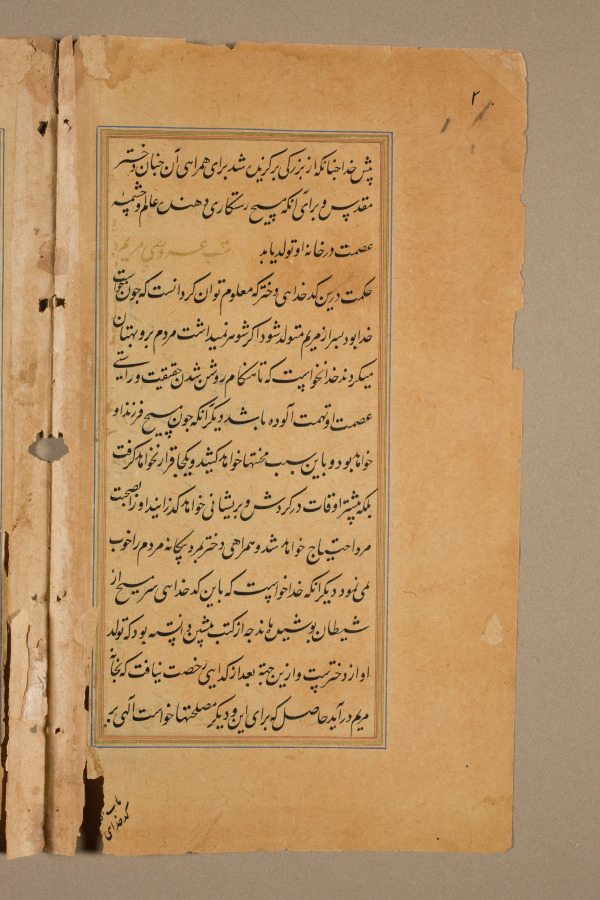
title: Text, Folio 12 (verso), from a Mirror of Holiness (Mir’at al-quds) of Father Jerome Xavier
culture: Mughal India, Allahabad, made for Prince Salim (1569–1627)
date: 1602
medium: Ink and gold on paper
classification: Manuscript